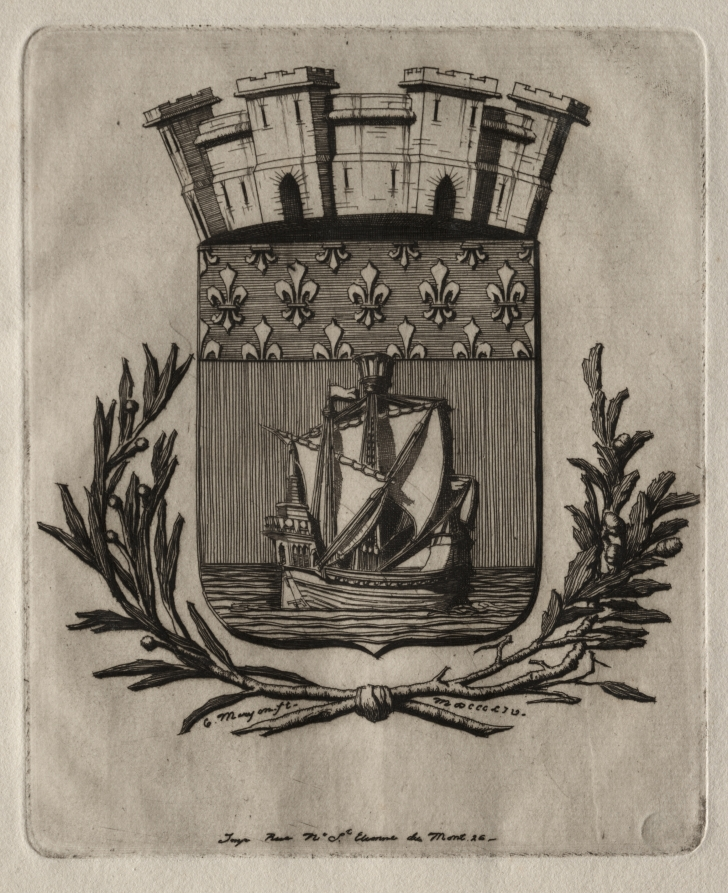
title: Etchings of Paris: The Symbolical Arms of the City of Paris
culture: France, 19th century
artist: Charles Meryon (French, 1821–1868)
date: 1854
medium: etching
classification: Print